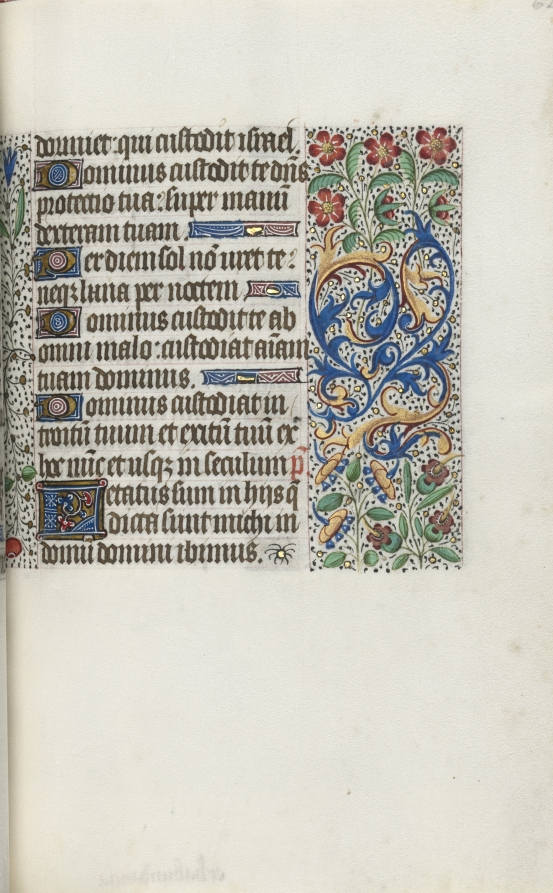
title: Book of Hours (Use of Rouen): fol. 62r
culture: France, Rouen, 15th century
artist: Master of the Geneva Latini (French, active Rouen, 1460–80)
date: c. 1470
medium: ink, tempera, and gold on vellum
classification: Bound Volume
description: In the late 1400s and early 1500s Rouen was an established and important center of book production. The city’s cathedral had a wealthy chapter that spent large sums of money to commission books and to maintain its extensive library. The stationers and booksellers would have likely been concentrated in or near the cathedral precinct. This artist, named after a manuscript now in Geneva, was Rouen’s principal illuminator during the second half of the 1400s.